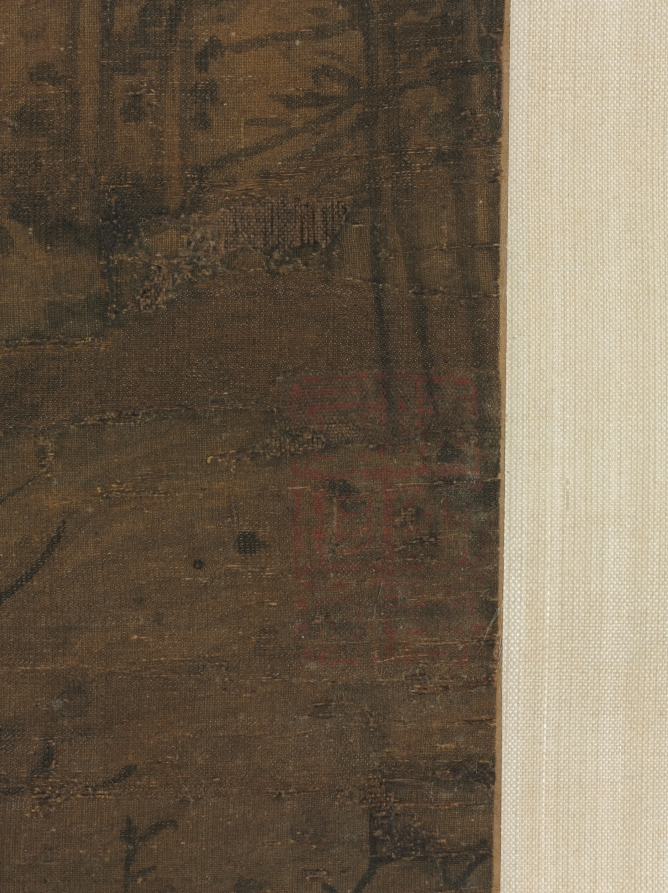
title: Summer Mountains (after Dong Yuan [active c. 937–75])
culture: China, Yuan dynasty (1271-1368)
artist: attributed to Huang Gongwang (Chinese, 1269–1354)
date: 1290–1354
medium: hanging scroll; ink and slight color on silk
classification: Painting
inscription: 【印】一峰道人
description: This monumental landscape is drawn in softly rounded strokes with darker lines frequently applied on top of lighter ones. This technique recalls one of the suggestions included in a collection of the artist's writings known as Secrets of Landscape Painting: The most difficult thing in painting is using the ink. The artist begins by using dilute ink and builds it up to the point where it begins to look right, then uses dense, black ink, applied fairly dry, and washes of deeper-toned ink. This technique distinguishes the fields from the paths, the far from the near. Huang Gongwang may have learned this technique from observing nature through the eyes of an earlier master, Dong Yuan, a painter whose style he shared.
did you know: The wet hills and moist, rich atmosphere evoke the southern Chinese summer, characterized by monsoon rains and lush growth.